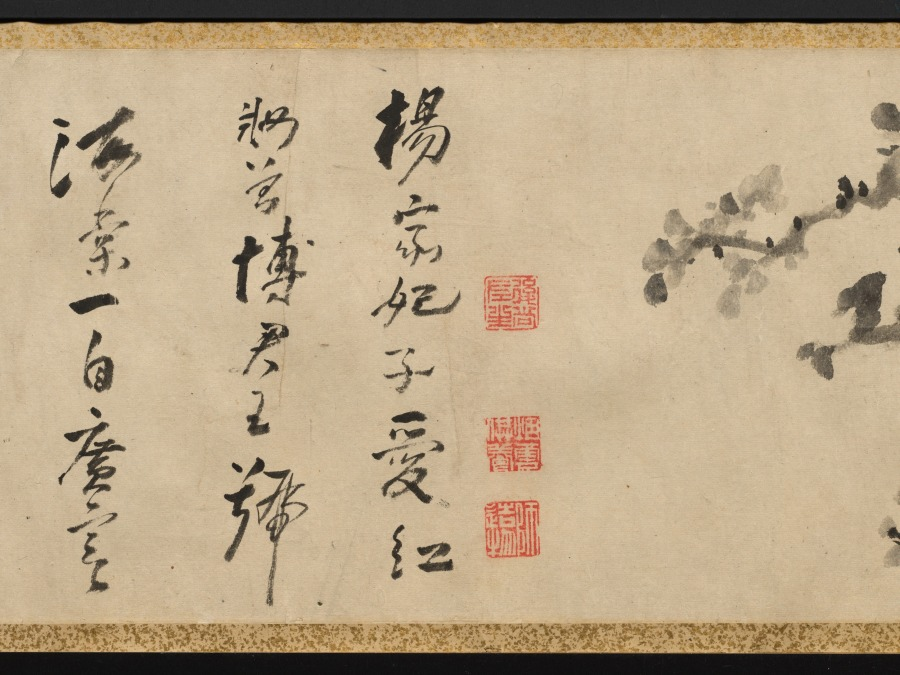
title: Plum Blossoms and Peonies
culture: China, Qing dynasty (1644-1911)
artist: Gao Fenghan (Chinese, 1683–1749)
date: 1741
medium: handscroll, ink on paper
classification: Painting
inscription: Artist's 2 inscriptions and 9 seals (the painting of Peonies with the artist's colophon and the colophon by Hou Chia-fan are on a single sheet of paper). Artist's inscription and 2 seals (Plum Blossoms): [seal] Ts'ai-yün. After finishing writing my colophon, I unrolled the painting to take another look, and it now seems that the composition here should have moved to the later part of the scroll. If that is the case, then the "Cool Beauty" [prunus] of the Solitary Hill is after all unable to take precedence over the "King of Flowers" [peony]. A laugh. Lao-fou inscribed. [seal] Feng-han. Artist's colophon (Plum Blossoms): [3 seals] Tun; Yen-yün-kung-yang, Hou-shang-tso-sheng. A few days after I painted this scroll for Shui- hsien [Yüeh Meng-yüan], the plum blossoms were in full bloom at his residence. He invited me over to enjoy them together for a long while, and I composed two additional poems and wrote them down here for his criticism. [Poems on the colophon are not translated.] First month, twenty-first day, your junior, Kao Feng-han of Nan-fou drafted this with the left hand. [seal] Feng-han. Artist's inscription and 4 seals (Peonies): Brushed with the left hand in the hsin-yu year [1741]. [seal] Yu-hsi. [3 seals at end of painting] Hou-shang-tso-sheng; Yen-yün-kung-yang; Shih-tsao-wu. Artist's colophon and seal (Peonies): The imperial concubine from the Yang family loved to dress in red, And from the emperor won the title of Hai-t'ang. But ever since she became the new dream of the moon palace, She changed into rainbow colors, while learning to dance. After I wrote the poem on Looking for Plum Blossoms in the Teng-wei Mountains, I attached to it a few branches of prunus, some bamboo tips and a piece of rock, with a scattering of green [moss] here and there to fill up the scroll. Unexpectedly, my playful fascination [with these subjects] was still not quite satisfied, so I made up these amorous ideas and romantic images [of the peony], to follow the footsteps of the fair lady of the Ku-hsieh Mountain [prunus]. Furthermore, I picked out one poem to be my vanguard. Perhaps such luminosity of wealth and power will be enough to overwhelm the poor fellows, and [they] will not mind the comparatively short length [of paper] assigned to it. Amusingly inscribed. Please correct me again. To Shui-hsien, my learned senior, your junior Han inscribed again. [seal] Tso-hua [left-handed painting]. 1 additional colophon and 5 additional seals: 1 colophon, dated 1742, and 3 seals of Hou Chia-fan (act. ca. 1742); 1 seal of P'u Ch'üan (20th c.?); 1 seal of Li family (dates unknown).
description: One of the so-called Yangzhou Eccentrics (a group of painters who lived in Yangzhou and were known for their unorthodox art and lifestyle), Gao Fenghan depicts China’s two most loved flowers in full bloom—the “cold beauty,” or plum blossom, in the first section, and the “king of flowers,” or peony, in the second section. Painted in 1741, the year when Gao decided to leave the south and return home to Shandong province in eastern China, this work was likely a token of farewell. His casual brushwork may indicate his mental and physical struggle at the time. After having crippled his right hand in 1737, Gao used his left hand to paint and achieved a crudeness and eccentric style unattainable before.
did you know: In East Asian art, peonies traditionally symbolize prosperity and wealth.